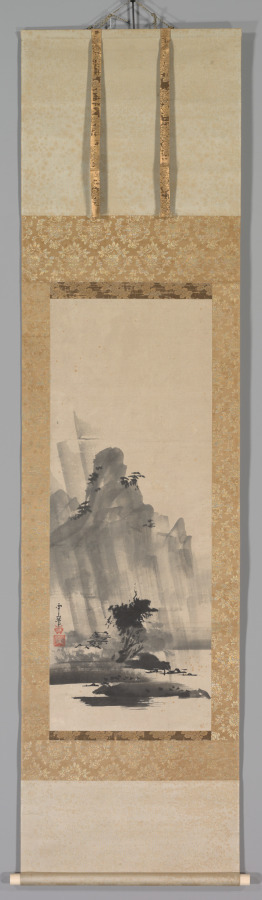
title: Mountain and River in Storm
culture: Japan, Edo period (1615–1868)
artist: Hirowatari Setsuzan (Japanese, ?-1674)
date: early to mid-1600s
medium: hanging scroll; ink on paper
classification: Painting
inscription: signed: Setsuzan hitsu